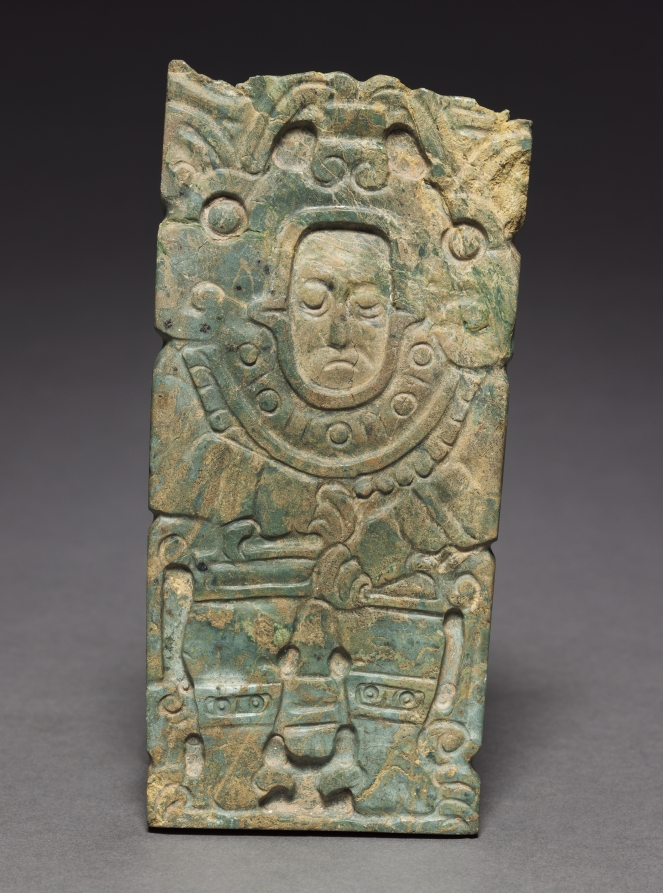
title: Pendant Plaque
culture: Mexico, Oaxaca, Zapotec, 6th-8th Century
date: c. 500–700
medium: jade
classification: Jade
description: This exceptionally large and elaborate plaque depicts a human being costumed as a jaguar, with claws on hands and feet, and a jaguar-head helmet. At the Zapotec capital, Monte Albán, dignitaries in feline garb are portrayed in several relief sculptures. A pendant similar to this one was found in an architectural dedicatory offering deposit at Monte Albán.